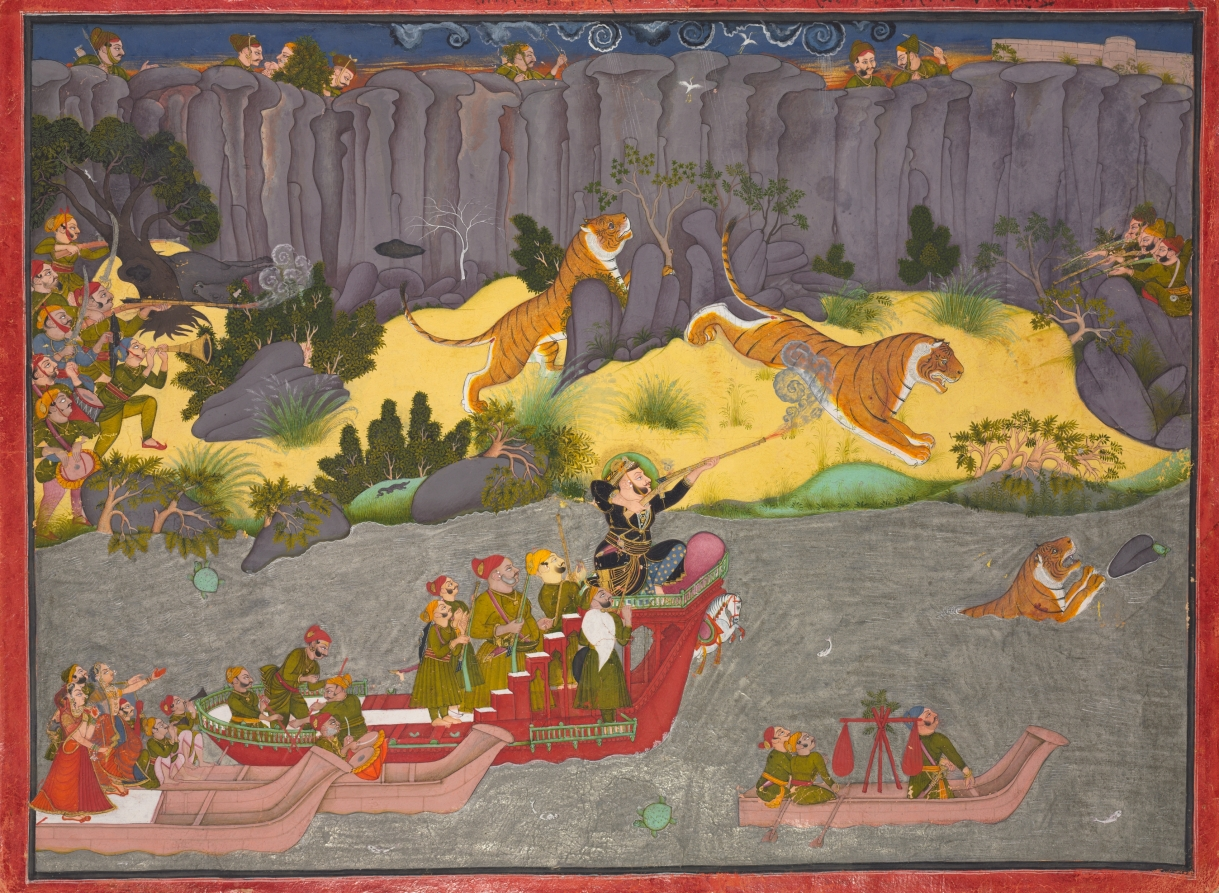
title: Tiger Hunt of Raja Ram Singh II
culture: Northwestern India, Rajasthan, Rajput Kingdom of Kota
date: c. 1830–1840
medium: Gum tempera, gold, and silver on paper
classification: Painting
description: With the dramatic cliffs of Kotah as the backdrop, one massive tiger is shown at three rapidly successive moments in time. Having been lured out of the forest by the dead bull at the upper left, the king’s men drive the tiger to the riverbanks with drums, trumpets, arrows, and muskets. The king himself, Ram Singh II who ruled the small kingdom of Kotah from 1827 until 1866, is shown in the act of delivering the fatal shot from the prow of a boat, as the ladies and nobles of the court look on in admiration. The tiger sinks into the river, from where he will be retrieved and offered with all honor and ceremony to a religious leader who will see to it that the shakti, or divine creative energies embodied by the tiger, be translated into blessings and prosperity for the kingdom. This example of a ritual tiger hunt belongs to a genre known as Rajput painting, made at the courts of kingdoms in Rajasthan that were under the aegis of the Mughal empire. The establishment of court painting workshops in the Rajput kingdoms was inspired by the imperial Mughal model, but each court developed its own distinctive style.